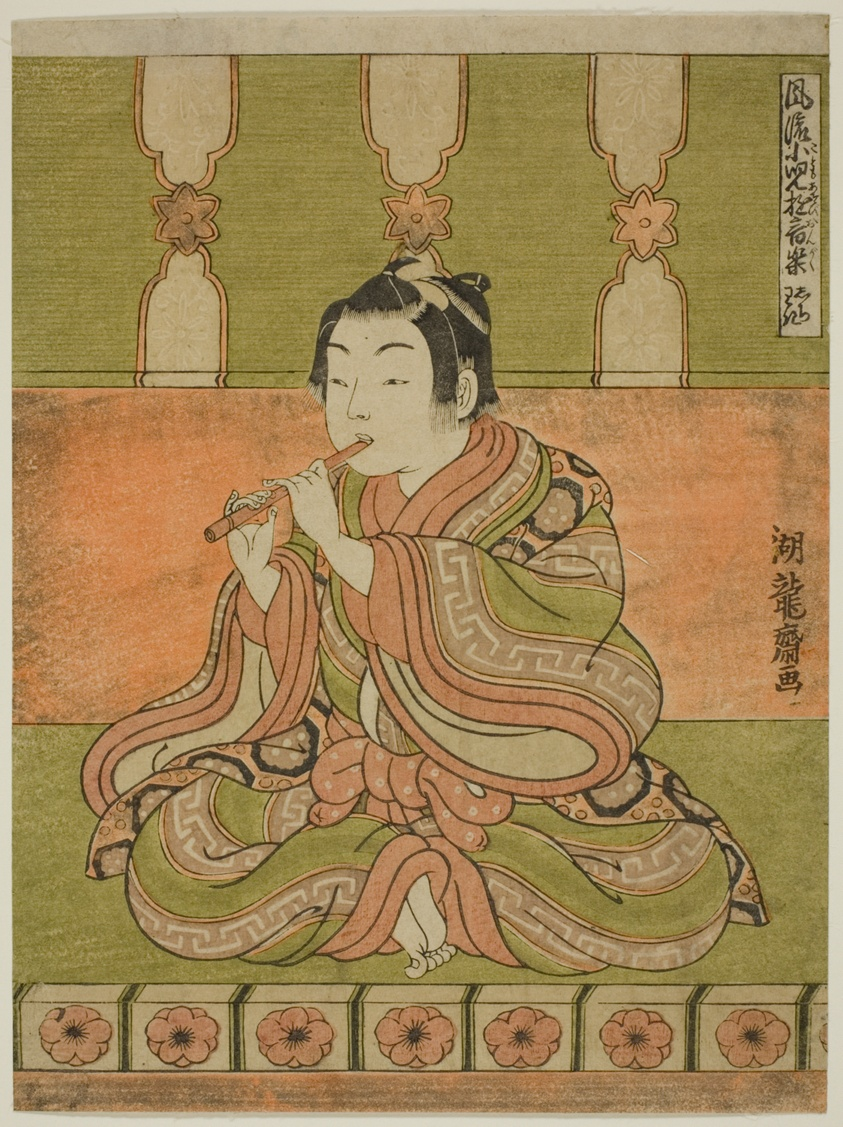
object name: Print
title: The Flute (Hichiriki), from the series "Fashionable Musical Amusements of Children (Furyu kodomo asobi ongaku)"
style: Japanese (culture or style)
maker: Isoda Koryusai (Japanese, 1735-1790)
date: c. 1770/72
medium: Color woodblock print; chuban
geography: Japan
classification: woodblock print; print; asian art